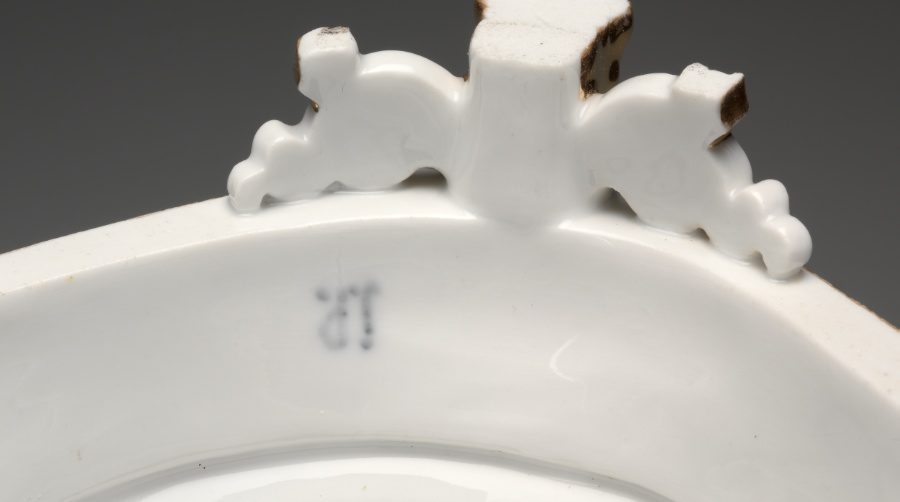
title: Ice Cream Pail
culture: France, Paris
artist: Factory of Jacob-Petit (French, 1830–1865)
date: c. 1840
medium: gilt porcelain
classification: Ceramic